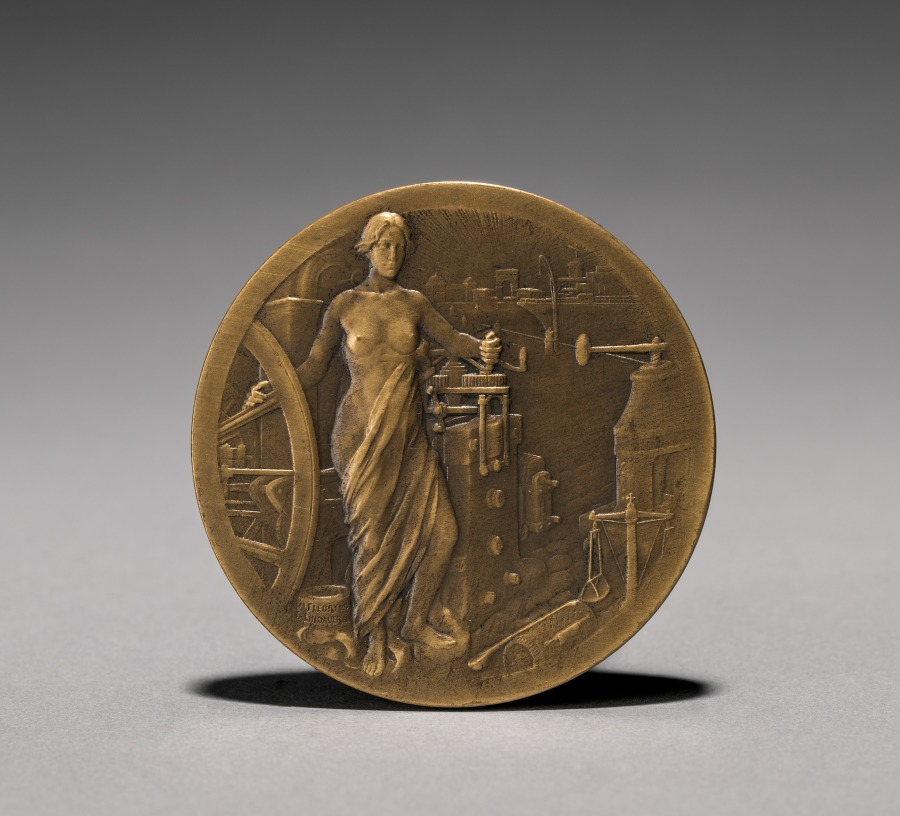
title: Medal (obverse)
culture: France, 20th century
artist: Edmond-Eugene-Emile Lindauer (French, 1869–1942)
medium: bronze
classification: Metalwork